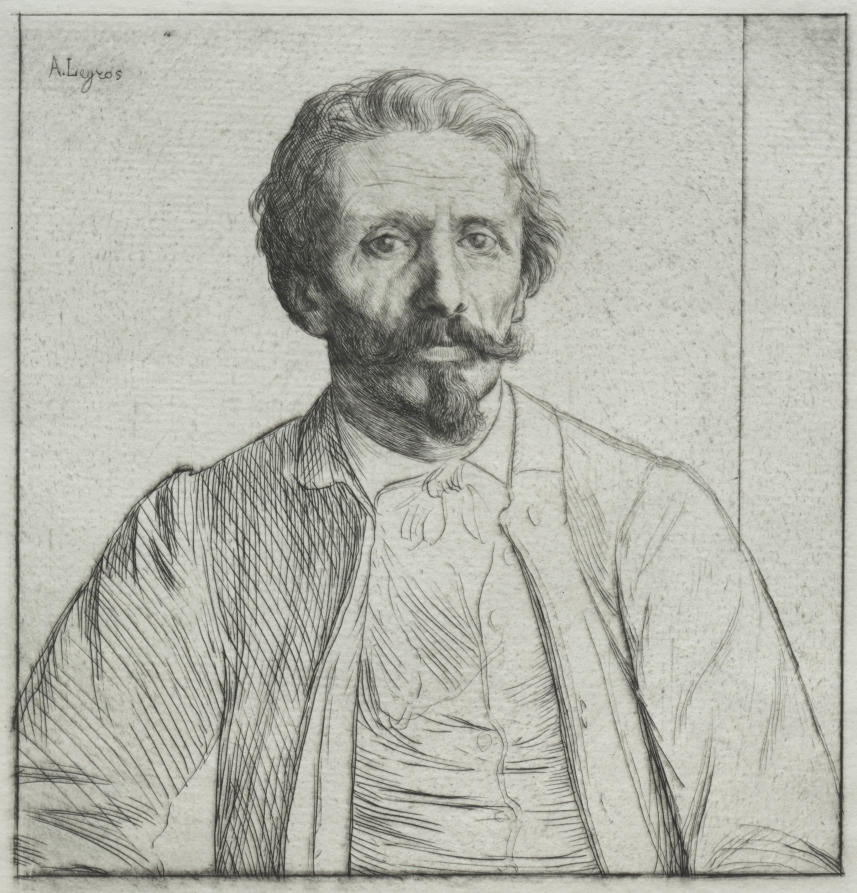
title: Auguste Delâtre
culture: France, 19th century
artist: Alphonse Legros (French, 1837–1911)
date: c. 1877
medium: drypoint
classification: Print